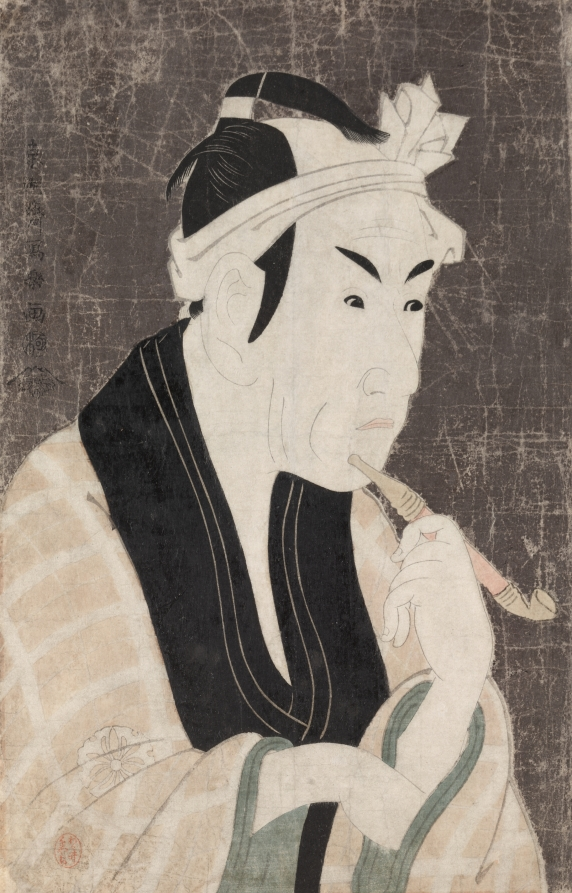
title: Matsumoto Koshiro IV as Gorobei, the Fish Seller from Sanya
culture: Japan, Edo period (1615–1868)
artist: Tōshūsai Sharaku (Japanese, active 1794–95)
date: 1794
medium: color woodblock print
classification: Print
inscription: Signature: Toshusai Sharaku ga Publisher: Tsutaya Juzaburo (emblem) Censorship Seal: kiwame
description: Sharaku portrayed the actor Matsumoto Koshiro IV in his role as the fish merchant Gorobei in the play A Medley of Tales of Revenge, performed at the Kiri Theater in June 1794. The actor specialized in the wagoto, or "gentle style," of acting. In the play, the fish merchant, whose business is located near the Yoshiwara, helps two courtesan sisters avenge their father’s murder. Sharaku created portraits for seven actors appearing in this play. During his ten-month career, Sharaku created about 150 designs for prints, including 28 bust portraits. Many of the portraits were printed with a gray mica background, a popular technique banned in 1794, the year Sharaku was active as a print designer. Censorship edicts restricted themes, sizes, and techniques used in the printing industry as an attempt to curtail the luxuries of the merchant class, patrons of prints. Although the lowest class in society, they had become the wealthiest class by the 18th century. In an effort to maintain a hierarchy, governmental edicts often regulated basic aspects of life.